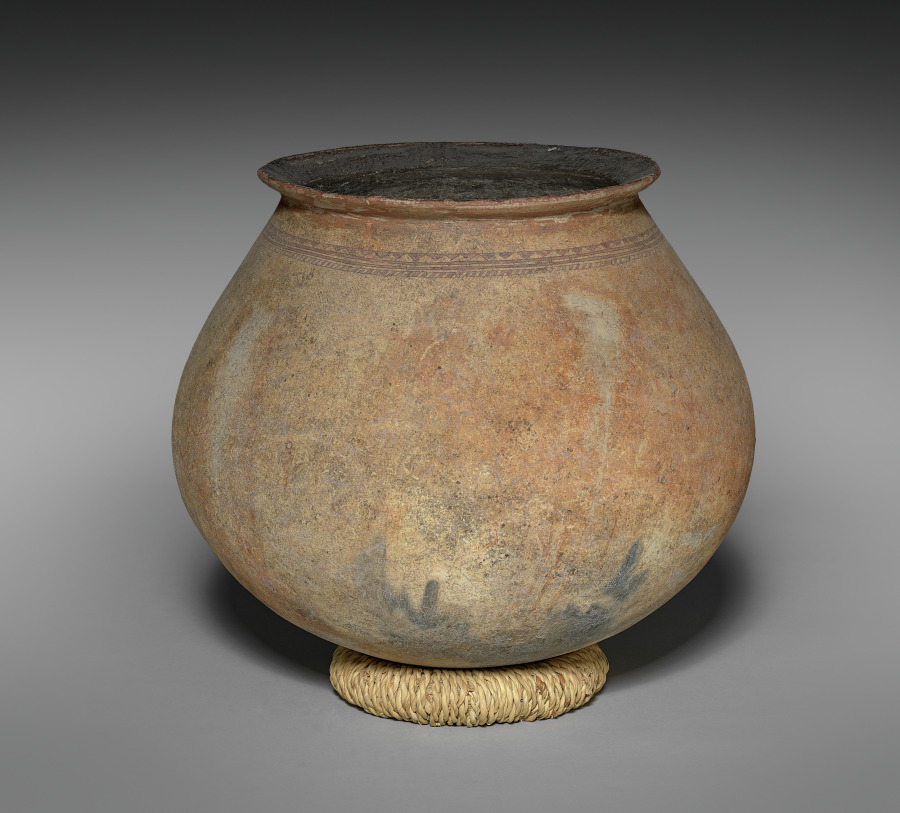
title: Jar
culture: Thailand, Ban Chiang, Neolithic Period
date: 3000s BCE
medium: reddish earthenware with painted decoration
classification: Ceramic